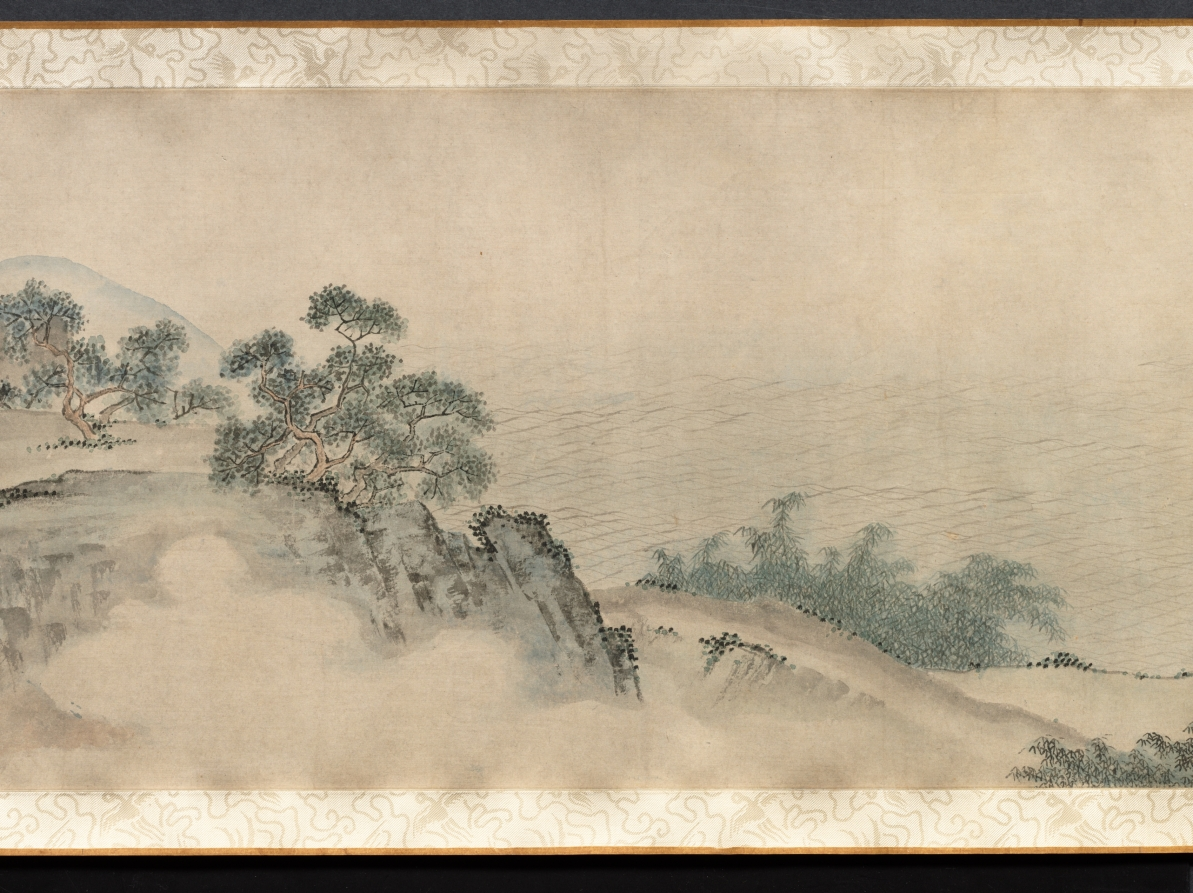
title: Ten Thousand Li of the Yangzi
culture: China, Ming dynasty (1368–1644)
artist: Dai Jin (Chinese, 1388–1462)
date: c. 1400s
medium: Handscroll; ink and color on paper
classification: Painting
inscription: Two colophons at end. Artist's seals: Dai Jin 戴進 and Wenjin 文進.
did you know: Dai Jin is traditionally considered the founder of the Zhe School, a style of landscape painting.